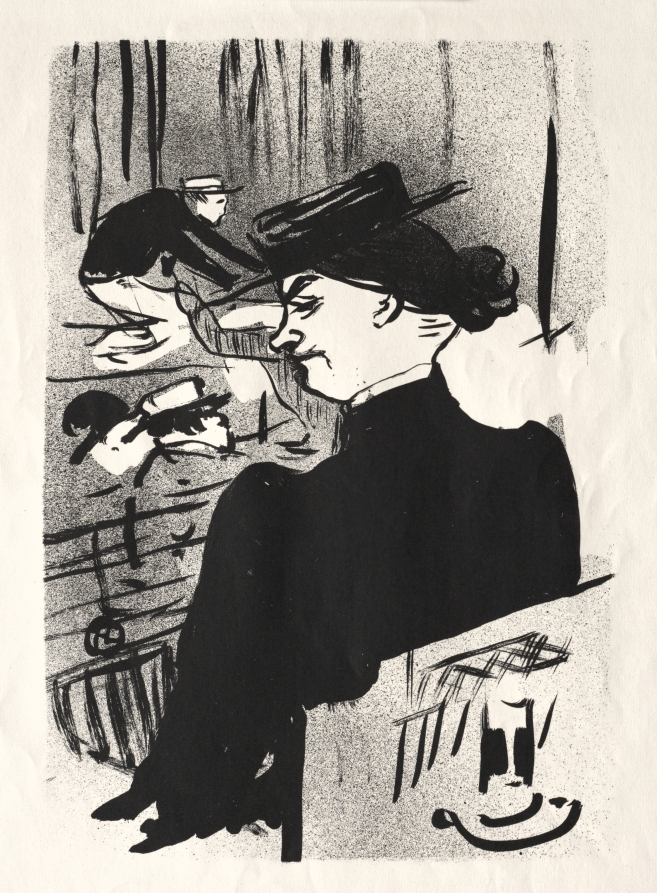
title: Le Café-concert: Une Spectatrice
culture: France, 19th century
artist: Henri de Toulouse-Lautrec (French, 1864–1901)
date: 1893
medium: lithograph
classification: Print